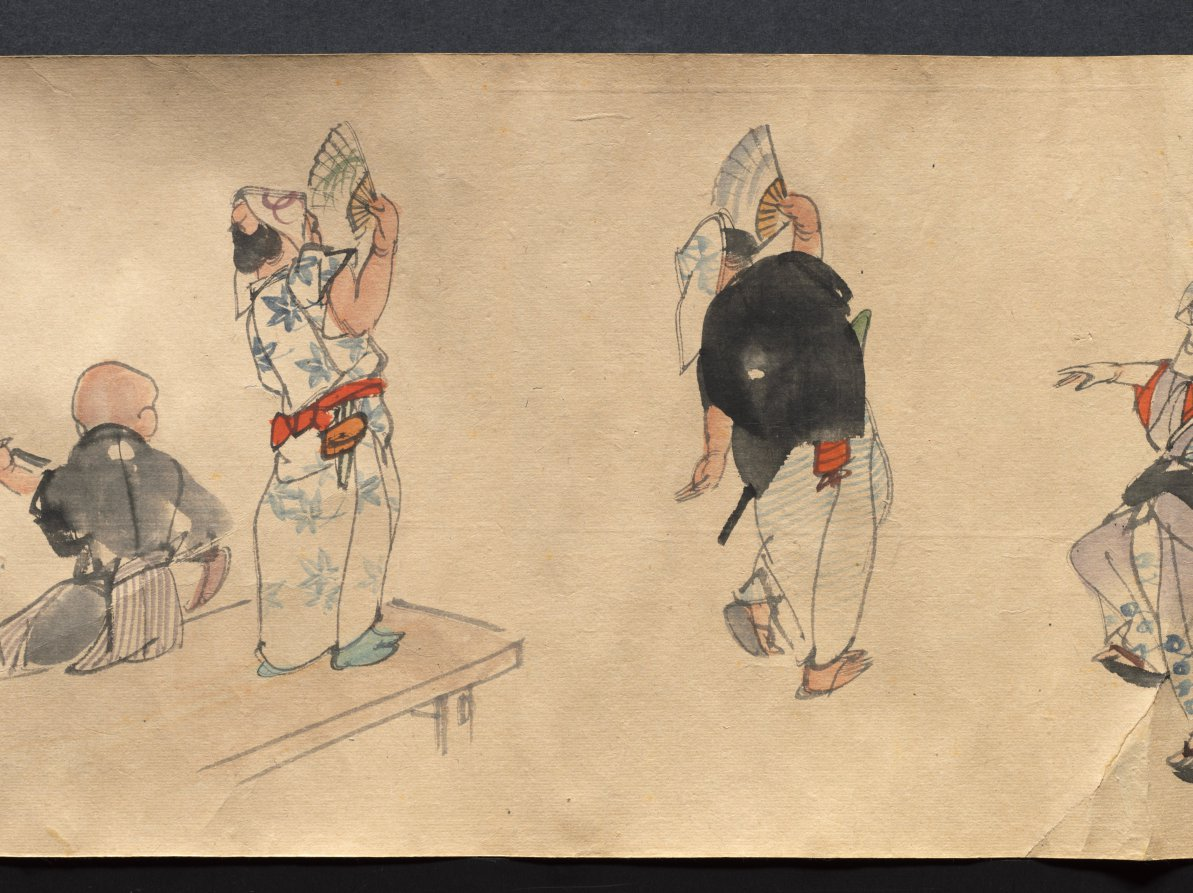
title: Festival Scenes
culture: Japan, Edo period (1615–1868)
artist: Suzuki Nanrei (Japanese, 1775–1844)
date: c. 1795–1844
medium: handscroll; ink and color on paper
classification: Painting